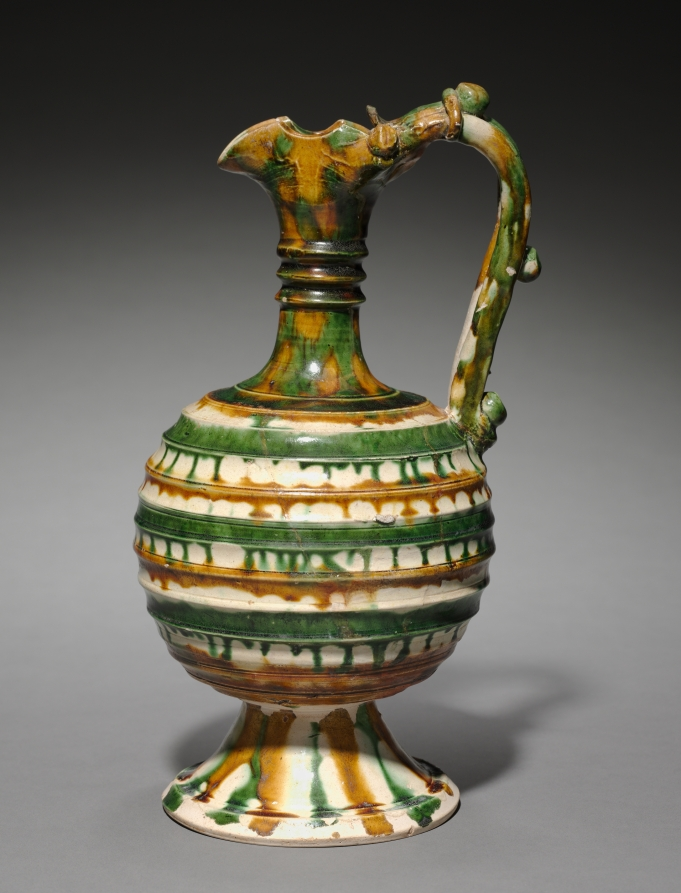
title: Ewer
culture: China, Tang dynasty (618-907)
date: 700–750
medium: glazed earthenware, sancai (three-color ware)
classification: Ceramic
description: Many sancai or "three-color" lead-glazed wares-such as this ewerare notable for their heavy dependence on metalwork prototypes. Such polychrome glazed wares were intended for the tomb.